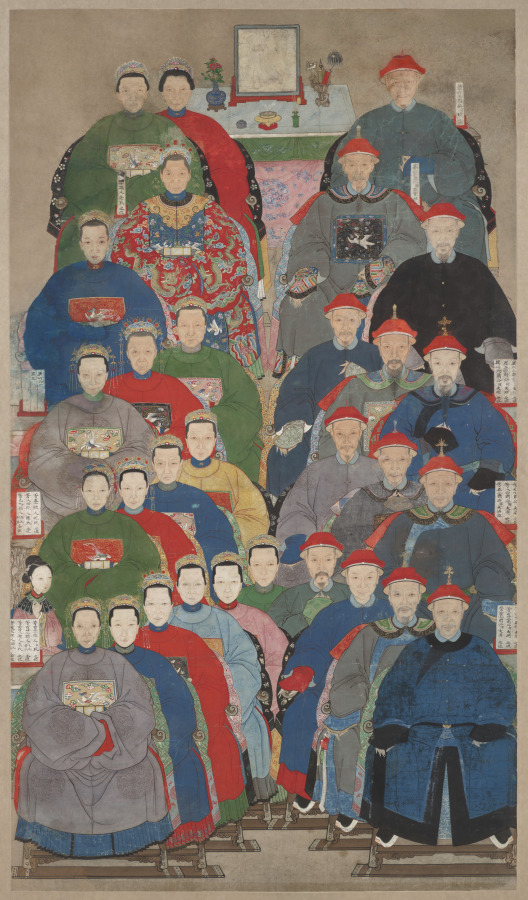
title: Ancestor Group Portrait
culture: China, Qing dynasty (1644-1911), Jiaqing period (1796-1820)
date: 1796–1820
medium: Hanging scroll; ink and color on paper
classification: Painting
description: From top to bottom this scroll features various generations of ancestors with men on the right and women on the left, 30 figures altogether. Inscribed tablets give their rank and relation within the family. Square badges on their robes indicate each figure's rank as an official. Scrolls of this type were displayed for worship at home during the New Year celebrations.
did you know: Court officials' wives could wear the same rank badge as their spouses.